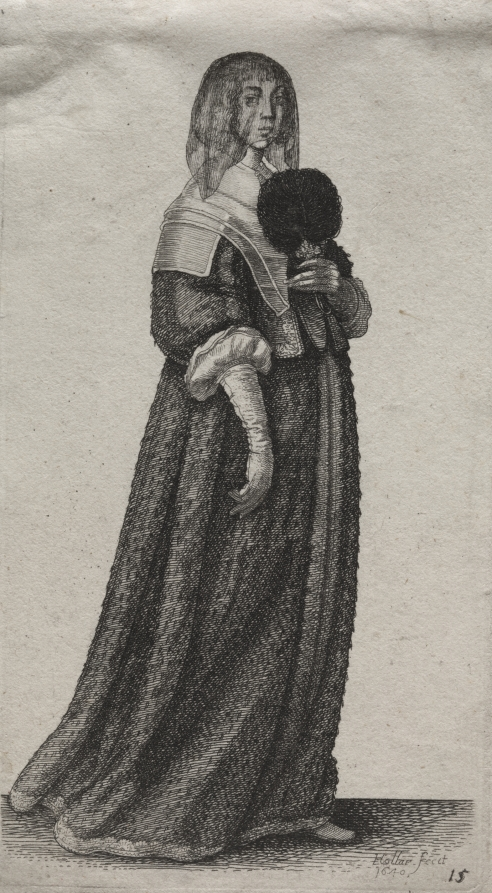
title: The Several Habits of English Women, from the Nobility to the Country Women as they are in these times: The Veiled Woman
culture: Bohemia, 17th century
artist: Wenceslaus Hollar (Bohemian, 1607–1677)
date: 1640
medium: etching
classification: Print